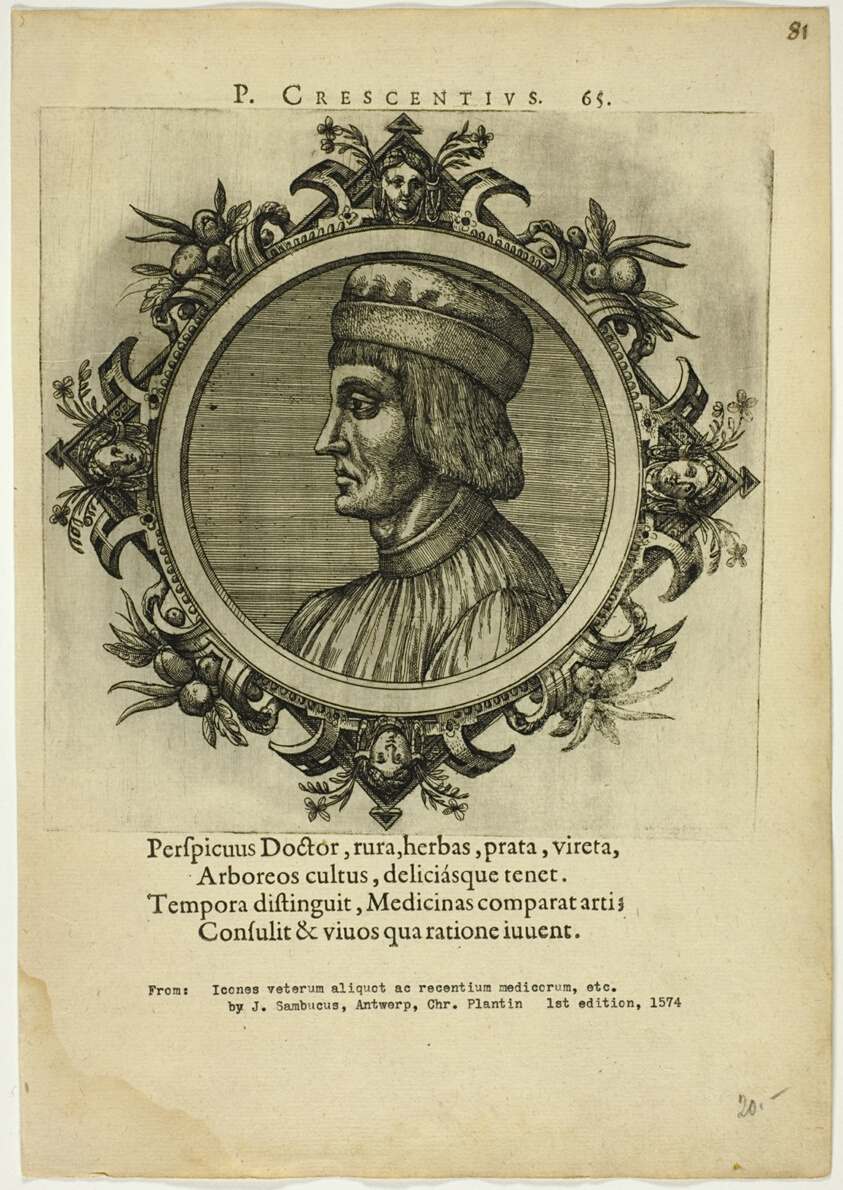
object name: Print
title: Portrait of P. Crescentius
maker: Unknown Artist (Flemish); written by Johannes Sambucus (Flemish, 1531-1584)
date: published 1574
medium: Etching, with engraving, on cream laid paper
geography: Flanders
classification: etching; print; prints and drawing